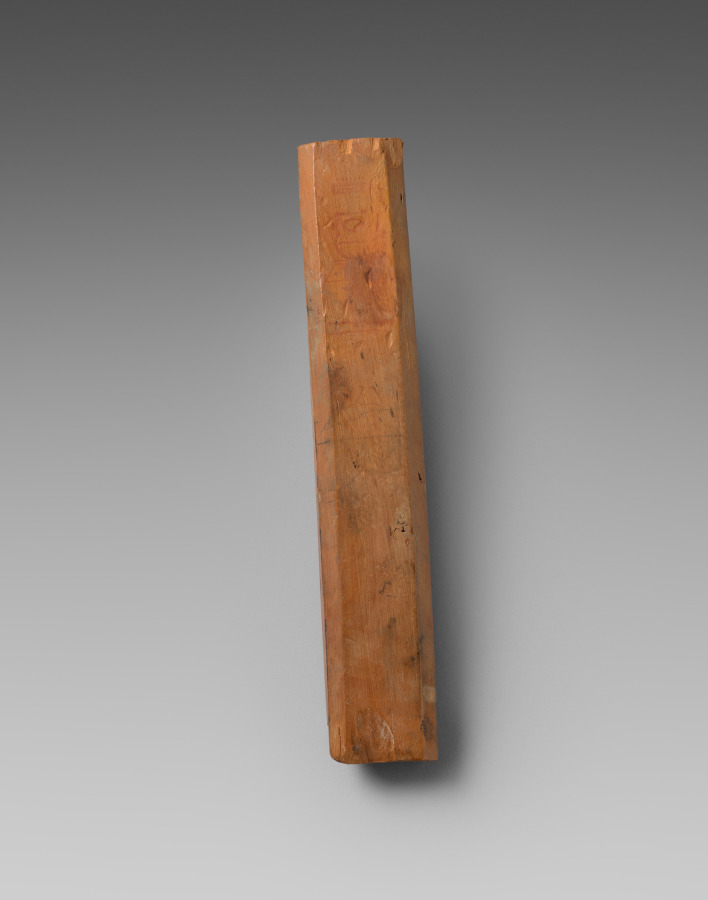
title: Paint Box of Vizier Amenemope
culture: Egypt, New Kingdom (1540–1069 BCE), Dynasty 18, reign of Amenhotep II (1425–1400 BCE)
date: c. 1427–1401 BCE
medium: boxwood with inscription inlaid in Egyptian blue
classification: Implements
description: This paint box still preserves its original cakes of pigment: one cake each of red (red ochre), blue (Egyptian blue), green (a mixture of Egyptian blue, yellow ochre, and orpiment) and two of black (carbon black, from charcoal). It belonged to Amenemope, who was vizier, or prime minister, under Amenhotep II. Amenemope probably used his paint box for recreation.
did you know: Painting was a popular and time-honored pastime among the upper classes in Egypt.